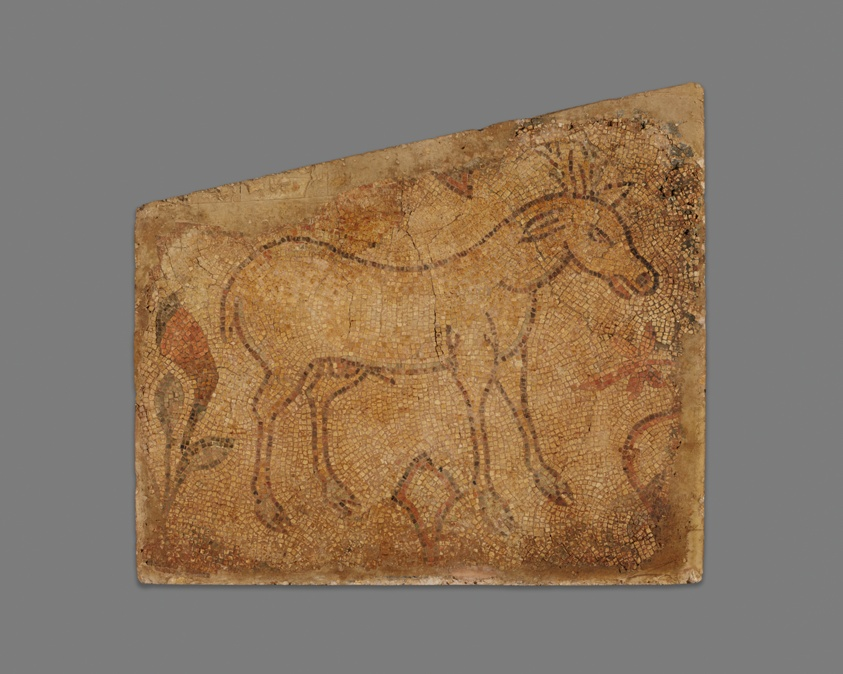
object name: Architectural fragment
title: Deer in Floral Field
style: roman (ancient, style or period), ancient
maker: Late Roman; probably Eastern Mediterranean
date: 4th-5th century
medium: Stone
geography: Italy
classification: mosaic; ancient art; architectural fragment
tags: deers